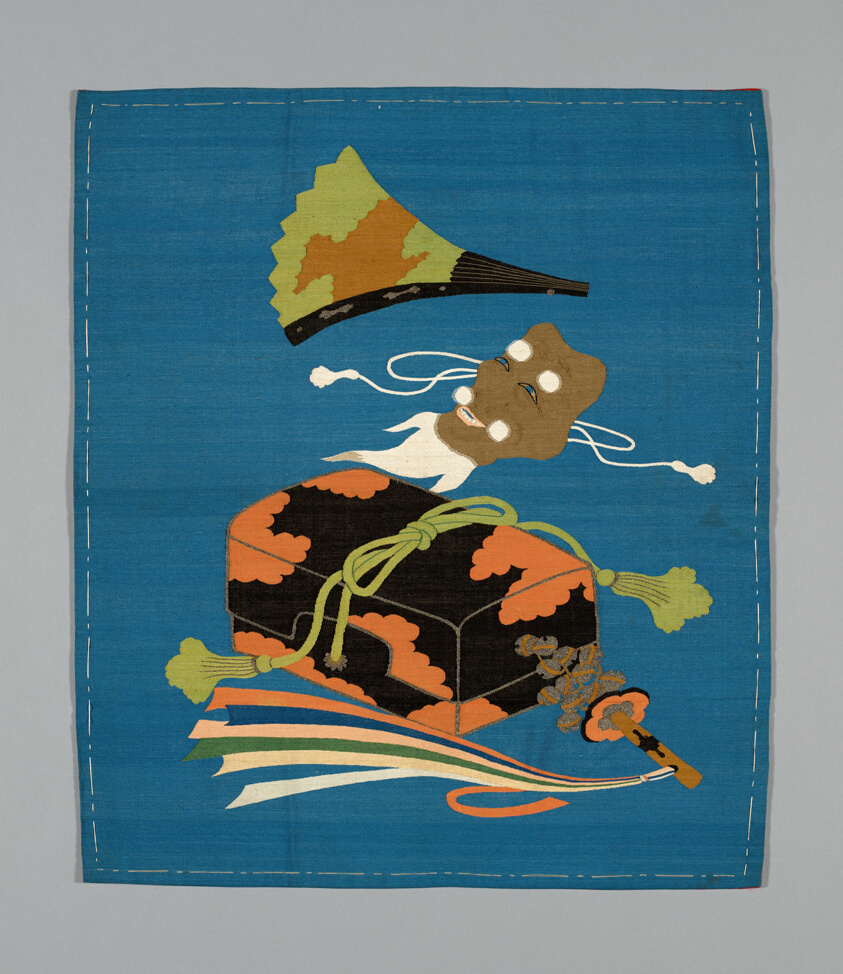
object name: Textile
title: Fukusa (Gift Cover)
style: late edo, meiji, edo (japanese period), Japanism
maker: Japan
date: late Edo period (1789–1868)/ Meiji period (1868–1912), 19th century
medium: Pattern side: silk, gold-leaf-over-lacquered-paper-strip wrapped cotton, slit and single dovetail tapestry weave (tsuzure); lining: silk, plain weave with “crepe-like” wefts (kabe-ito wefts); sewn with front and lining matched in size (Tachikiri awase); silk, running “controlling” stitches along all edges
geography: Japan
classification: textile; weaving